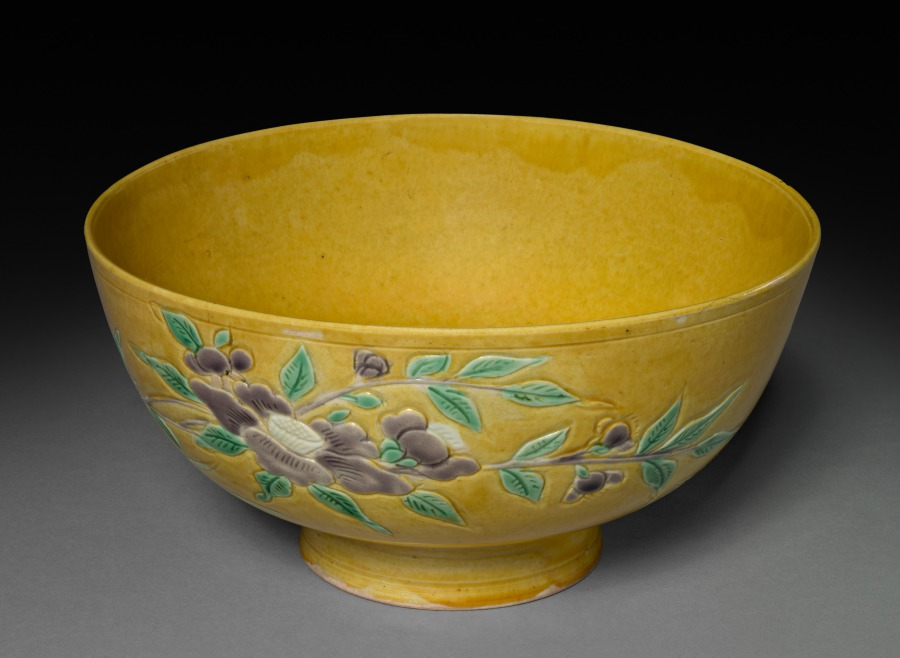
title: Bowl with Birds and Flowers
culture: China, Jiangxi province, Jingdezhen kilns, Qing dynasty (1644-1911), "Transitional Period," Shunzi period (1644-61)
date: 1644–61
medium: porcelain with incised and sancai (3-color) enamel decoration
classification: Ceramic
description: This porcelain bowl is considered to have been made in the "Transitional period," a term used to define the period between about 1620 and 1683 when official kilns in Jingdezhen were no longer under imperial supervision due to the transition from the Ming to the Qing dynasties.